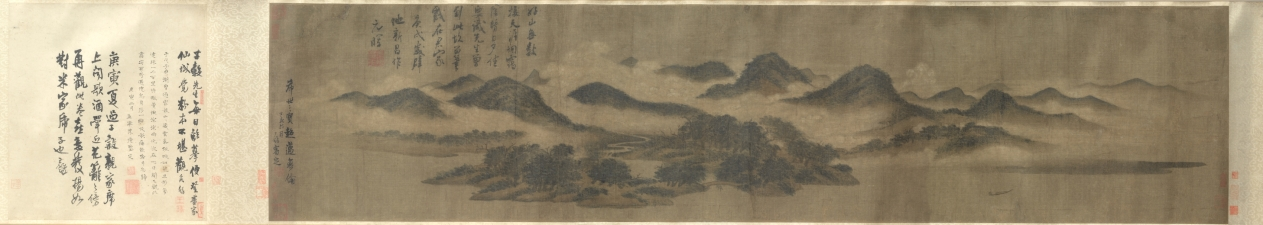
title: Cloudy Mountains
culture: China, Southern Song dynasty (1127-1279)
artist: Mi Youren (Chinese, 1072–1151)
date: 1130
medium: Handscroll; ink and color on silk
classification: Painting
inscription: 好山無數接天涯，烟靄陰晴日夕佳。/ 要識先生會到此，故留筆戲在君家。/ 庚戍歲，辟地新昌作。元暉。/ [seal] 元暉戲作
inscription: [Seal] 安陽孫氏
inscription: [Seal] 畢瀧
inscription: [Seal] 成親王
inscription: [Seal] 永瑆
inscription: [Seal] 錫三 appears twice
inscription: [Seal] 養性齋珍藏書畫印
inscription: [Seal] 芷陔審定真跡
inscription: [Seal] 玉簡齋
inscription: 2 colophons (1 dated 1650), inscription dated 1647, and 2 seals of Wang To (1592–1652)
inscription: 1 colophon, dated second month of the gengyin year 庚寅 (1650), and 2 seals of Chen Kuang 陳爌 (1646 jinshi degree)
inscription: 7 seals unidentified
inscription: A separate scroll containing six colophons on Cloudy Mountains exists; the inscribers are Luo Zhenyu 羅振玉 (1866–1940), Naito Torajiro 內藤虎次郎 (1866–1934), Nagao Ko 長尾甲 (1864–1942), and Wu Changshuo 吳昌碩 (1844–1927). Naito Torajiro alone wrote three colophons.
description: Cloudy Mountains captures the view of a lush and misty riverscape, an impression of Mi Youren’s new environment, painted in a moment of peace. With the fall of the Northern Song dynasty in 1127 upon the Jurchen’s military invasion, Mi Youren fled south across the Yangzi River. In 1130, he had reached Xinchang in Zhejiang province and thanked his host with this painting for having given him shelter. Mi Youren was the oldest son of the art critic Mi Fu (1051– 1107); both developed a distinct style of mountain scenery by accumulating wet ink dots that create a hazy atmosphere.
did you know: This scroll is one of the museum’s earliest dated Chinese paintings.